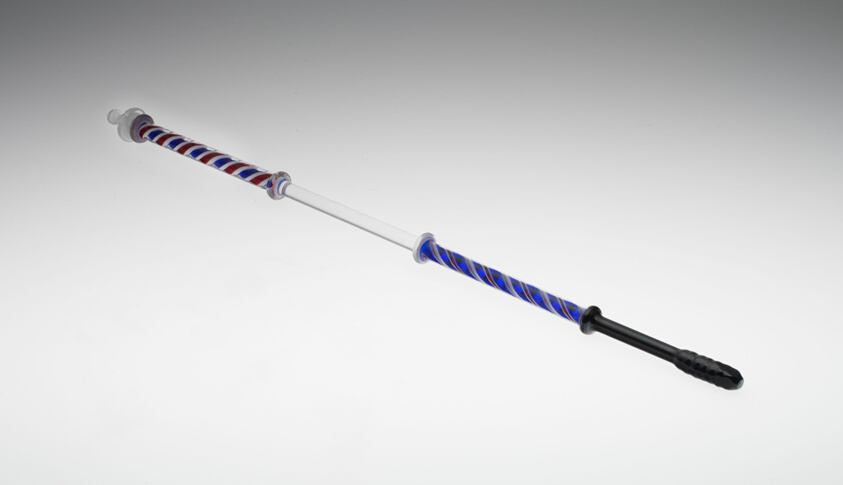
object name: Glass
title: Poker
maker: England, Bristol or Stourbridge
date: 19th century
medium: Glass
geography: Bristol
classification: fireplace equipment; european decorative arts; glass